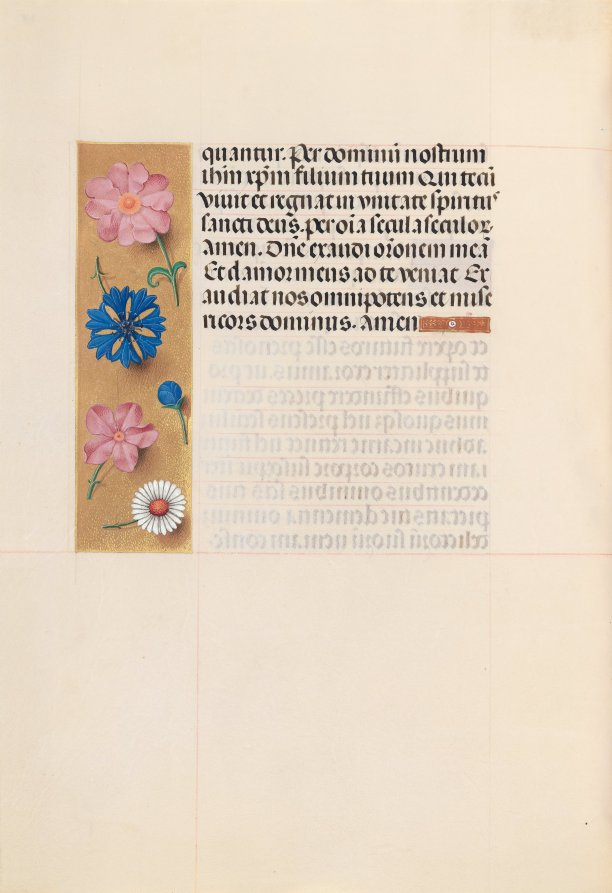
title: Hours of Queen Isabella the Catholic, Queen of Spain: Fol. 218v, Office of the Dead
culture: Flanders, Ghent and Bruges, late 15th century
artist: Master of the First Prayerbook of Maximillian (Flemish, c. 1444–1519)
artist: and Associates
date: c. 1500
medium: ink, tempera, and gold on vellum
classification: Bound Volume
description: This manuscript was illuminated by a circle of at least five highly organized manuscript painters active in the Flemish cities of Ghent and Bruges. The principal illuminator was Alexander Bening, who painted the majority of the book's miniatures. Manuscripts produced by this circle of artists are renowned for the decoration of their borders, which typically feature a rich variety of realistically-painted flowers, birds, and butterflies. This prayer book, called a book of hours, was intended not for a cleric, but for the private devotions of a lay person-in this case, Isabella the Catholic, Queen of Spain (1451-1504). Isabella's coat of arms embellishes the book's frontispiece. It is unlikely that the book was commissioned by the Queen herself; rather, she probably received it as a diplomatic gift from someone courting her patronage, perhaps Cardinal Francisco Jimenez de Cisneros. A Franciscan friar, Jimenez was dependent upon Isabella for his advancement, first to the post of Queen's confessor in 1492, and then to Archbishop of Toledo in 1495.